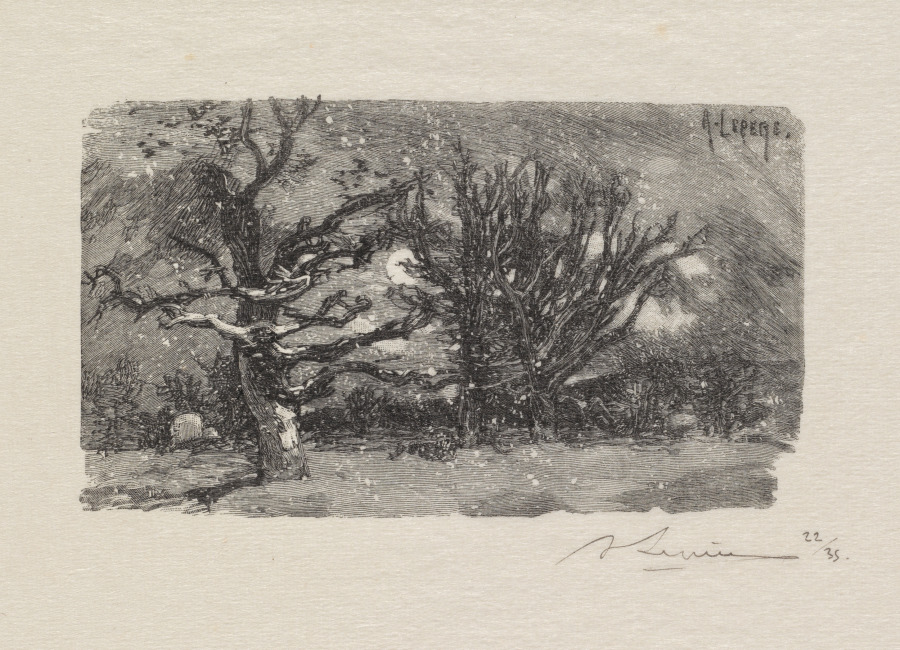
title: Fontainebleau Forest: Au dormoir de Lantara (La Forêt de Fontainebleau: Au dormoir de Lantara)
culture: France, 19th century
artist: Auguste Louis Lepère (French, 1849–1918)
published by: A. Desmoulins, Published in Revue Illustrée, 1887–90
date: 1890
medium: wood engraving from bound volume of 34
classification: Bound Volume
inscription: In block, upper right: A. LEPÈRE; below image, lower right, in black ink: ALepère 22/35; on window mat, lower right, in graphite: Au dormoir de Lantara